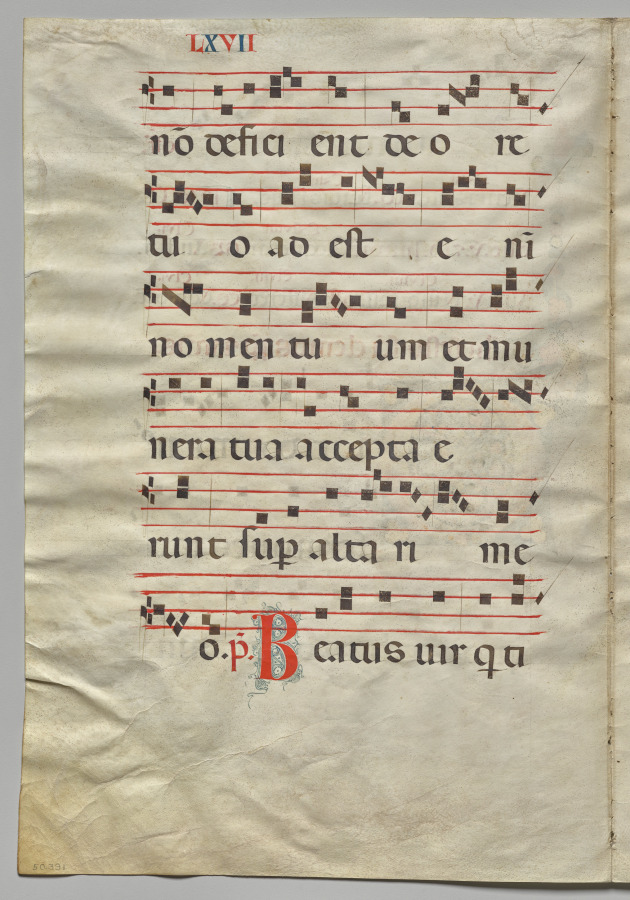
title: Bifolio from a Gradual: Music and Text (verso)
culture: Italy, Siena(?)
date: c. 1300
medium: Ink, tempera, and gold on vellum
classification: Manuscript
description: The large decorated initial G introduces the text, Gaudeamus omnes in Domino (Let us rejoice in the Lord). It is the beginning of the opening prayer, or introit, of the Mass for the Feast of All Saints (November 1). The figures within the initial include Christ, the Virgin Mary, and various saints.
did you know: Words written in red ink, called rubrics, indicate titles and chapter headings that are not part of a manuscript’s main text.